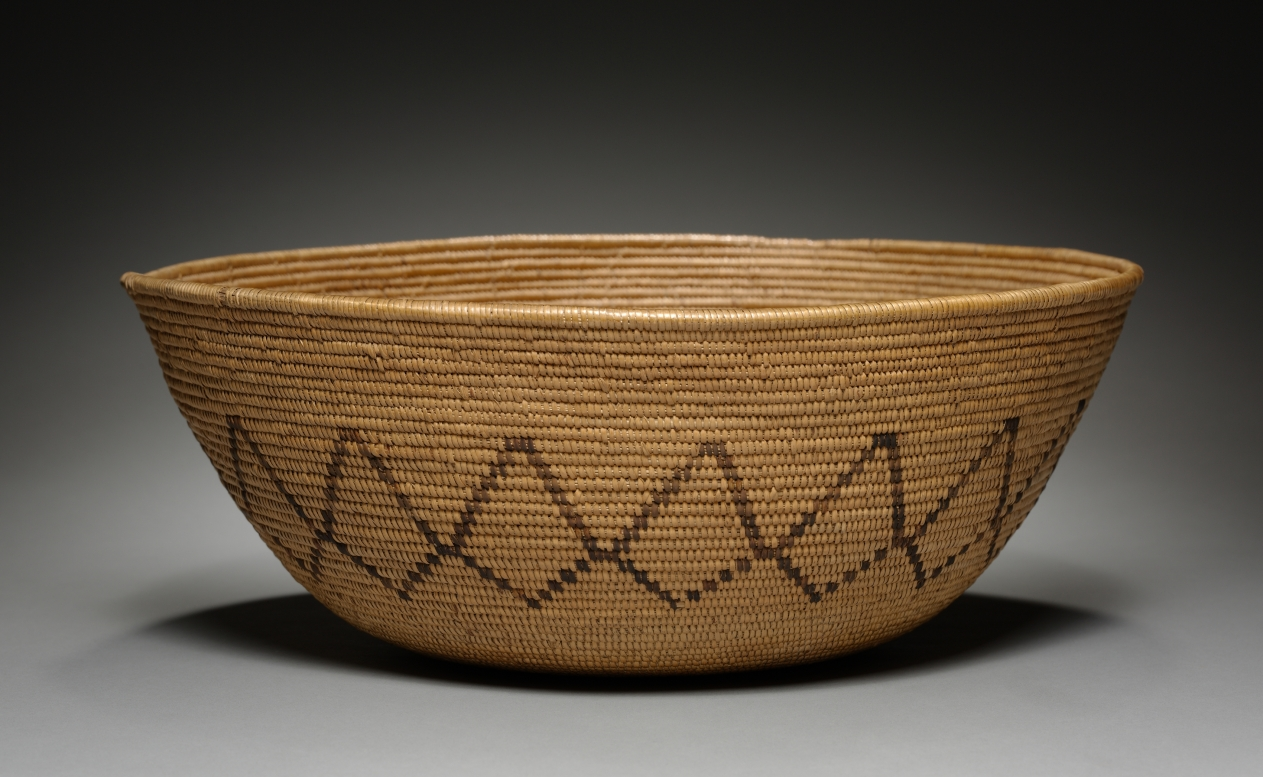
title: Bowl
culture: California, Southern, Gabrielino (San Gabriel, Mission or Tongva), Late 19th- Early 20th century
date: c 1875– 1925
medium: coiled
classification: Basketry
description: CMA Bulletin, December 1930